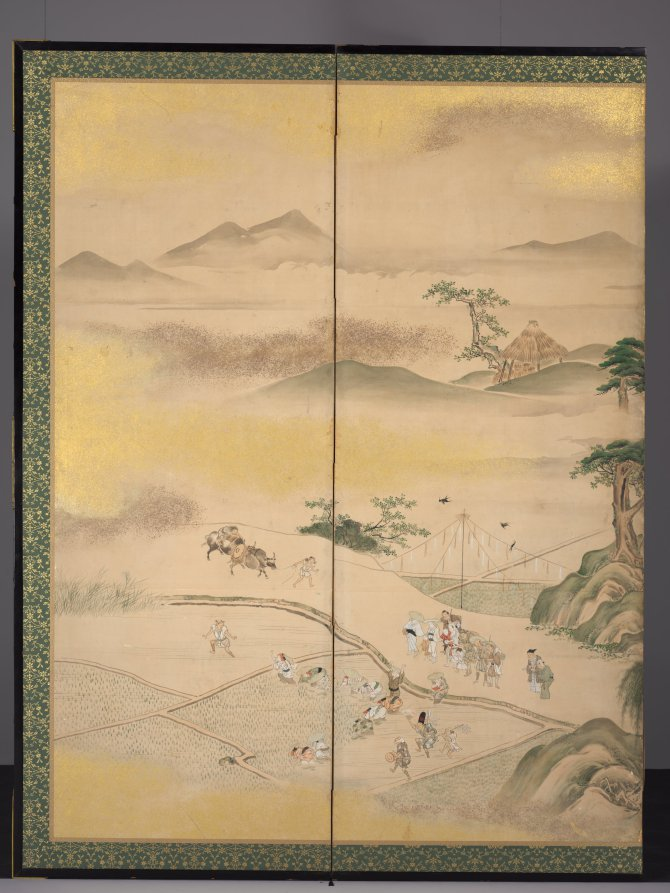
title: Spring and Autumn Farming (Spring)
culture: Japan, Edo period (1615–1868)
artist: Kō Sūkoku (Japanese, 1730–1804)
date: 1700s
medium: Six-panel folding screen, ink, light color, gold, and silver on paper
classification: Painting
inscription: Signature of the artist: "Enrin san jin Rakushisai ko Sukoku ga" (each screen)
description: These screens present the cycle of the farming year, starting with spring at right and ending with fall at left. Close examination of these screens reveals moments of games and amusement, the enjoyment of meals as well as intellectual and spiritual pursuits interspersed among the scenes of cultivating and preparing the rice harvest. The artist Kō Sūkoku is considered the 18th-century heir in style and attitude to Hanabusa Itchō (1652–1724). Itchō’s work incorporated elements from Kano school, ukiyo-e, and literati styles of painting. Kō trained with one of Hanabusa’s pupils, Sawaki Sūshi, who was best known for scenes depicting everyday life and customs.